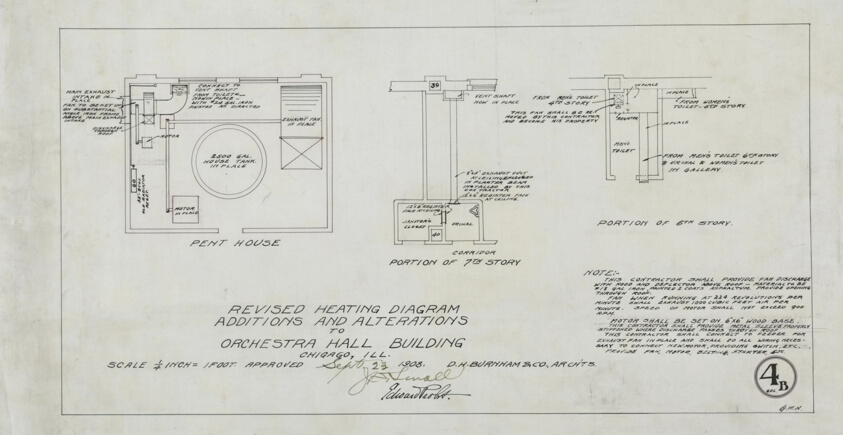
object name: Architectural Drawing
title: Orchestra Hall Heating Revisions, Chicago, Illinois, Diagrams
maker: D.H. Burnham & Company; American, 1896–1912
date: 1908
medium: Ink on linen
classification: architecture; architectural drawing